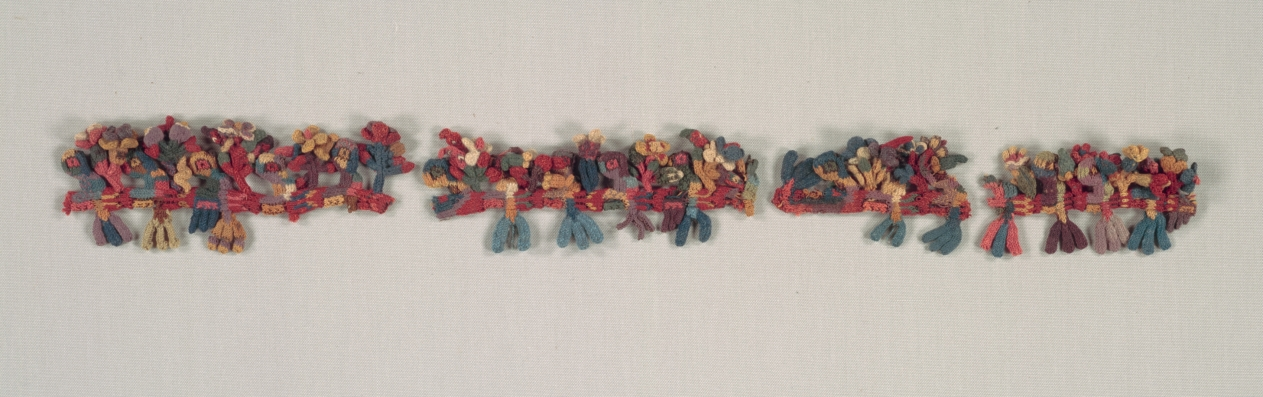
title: Border Fragment with Birds and Flowers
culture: Peru, South Coast, Nasca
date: 100 BCE–700 CE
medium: camelid fiber, cross-knit looping (reversible)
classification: Embroidery